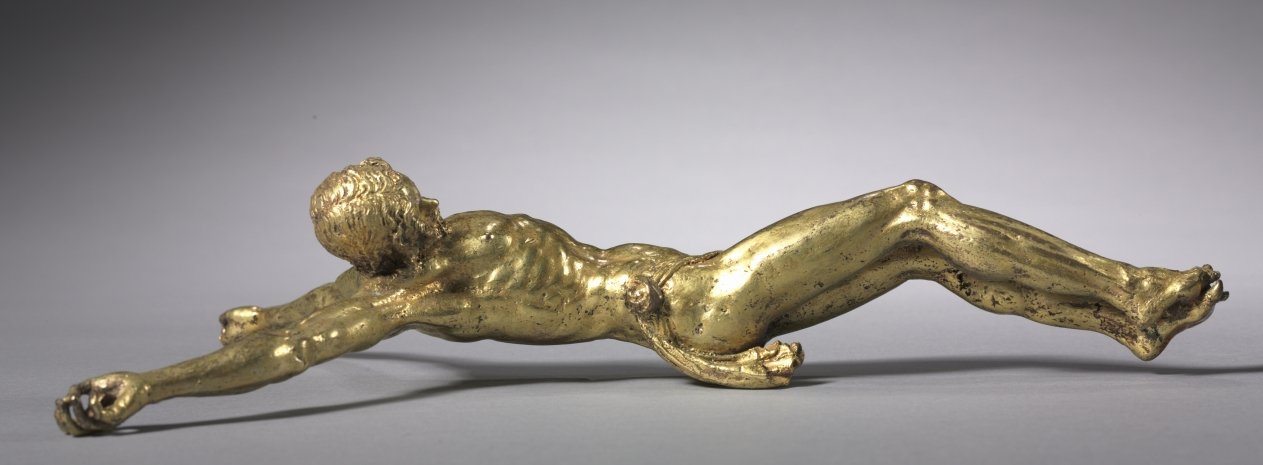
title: Crucified Christ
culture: Italy, 17th or 18th century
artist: cast after a model by Giambologna (Flemish, active Italy, 1529–1608)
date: 1600s or 1700s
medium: bronze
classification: Sculpture